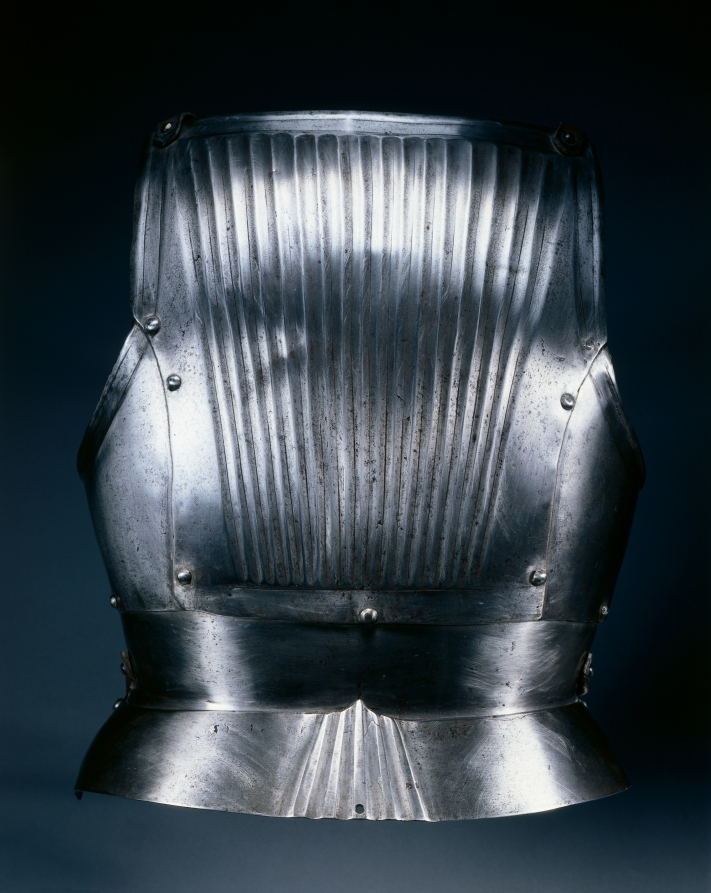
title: Backplate in the Maximilian Style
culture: Germany, Nuremberg(?), early 16th century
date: c.1510–30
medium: steel, brass rivets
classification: Arms and Armor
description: Distinguished by its regularly fluted surfaces, armor in this style was popularized in South Germany during the early 1500s. The style is usually called "Maximilian," as it was introduced during the reign of Emperor Maximilian I (1493-1519). The style reflects male costume of the period and the shift to the new rounded forms of the Renaissance. Other examples of this armor style may be seen nearby.